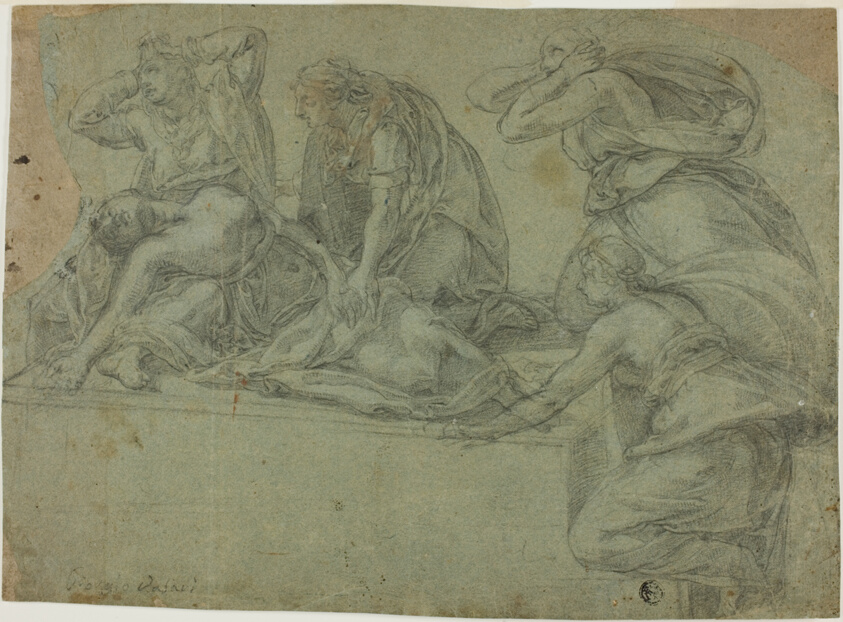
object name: Drawing and Watercolor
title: Death of Cleopatra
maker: Follower of Daniela da Volterra (Italian; 1509-1566); or circle of Rosso Fiorentino (Italian, 1494-1540)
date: c. 1540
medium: Black chalk on blue-gray laid paper, laid down on cream laid paper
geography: Florence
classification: chalk; drawings (visual works); prints and drawing